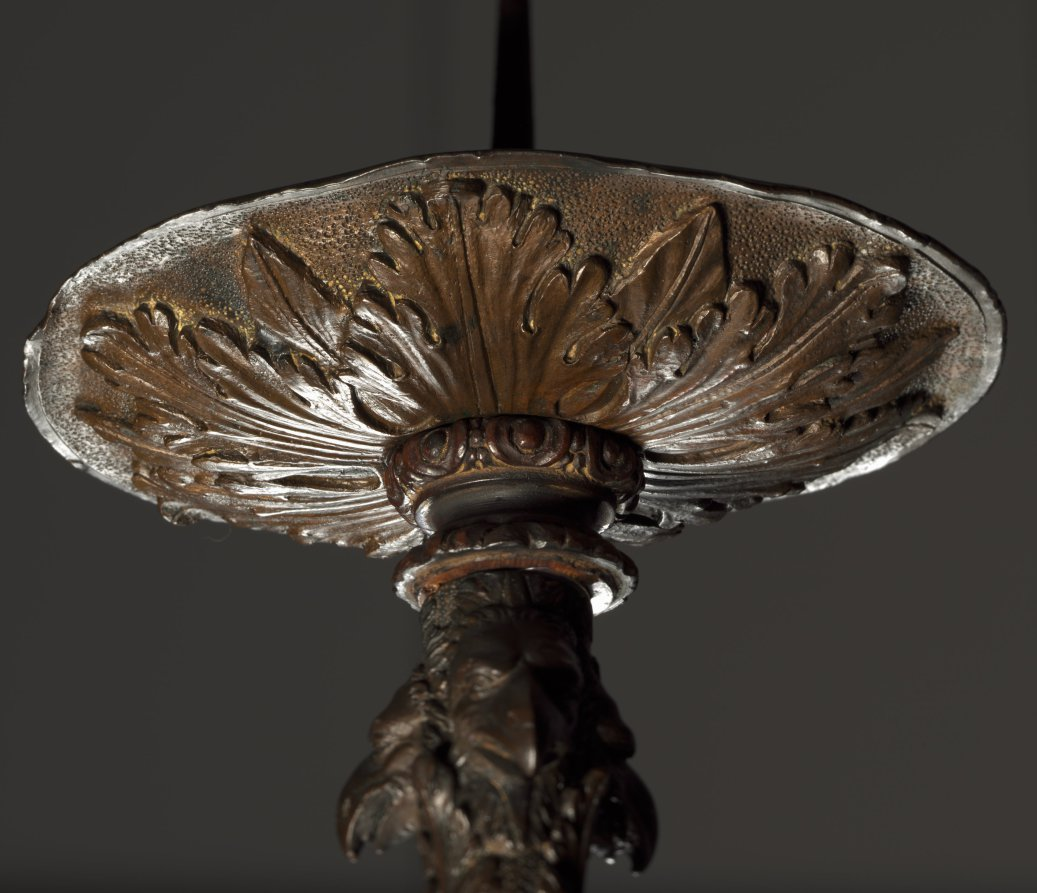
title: Paschal Candlestick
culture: Northern Italy, possibly Padua, 16th century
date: c. 1525–1550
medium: bronze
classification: Sculpture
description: In Roman Catholic practice, a large candlestick holds the Paschal Candle, blessed and lit for the first time on Easter eve, then used on significant occasions throughout the year. Despite its religious function, the decorations here are entirely secular-ranging from panthers and bound satyrs to the heads of raptors and goats. These elements derive from ancient Roman sculpture and were especially popular among intellectuals in northern Italy, who were actively exploring connections among pagan traditions, ancient philosophy, and Christianity.